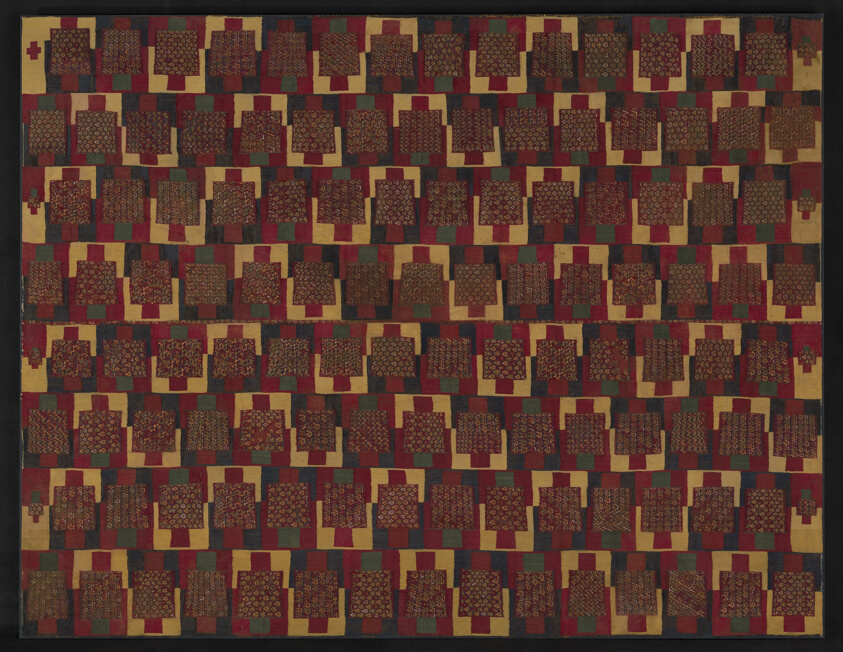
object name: Costume and Accessories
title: Poncho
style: Chuquibamba, peruvian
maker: Chuquibamba region (south coast, Peru)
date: 1300/1550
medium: Camelid wool, single interlocking tapestry weave and five-color complementary weft weave with center band of complementary weft weave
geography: Peru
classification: textile; weaving; costume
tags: geometric, status, offering, birds, fish